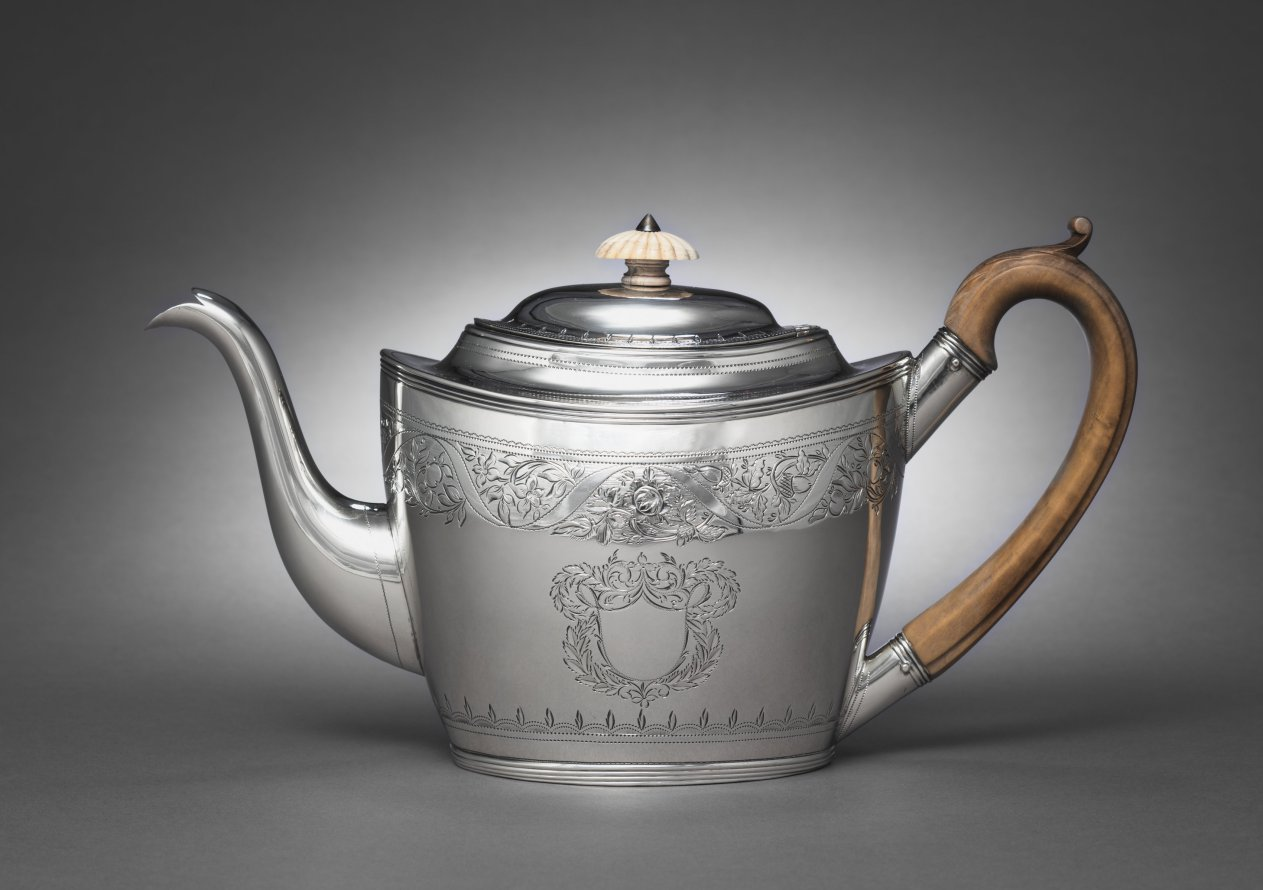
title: Tea Service (Teapot)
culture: London, England, 19th century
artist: Anne Bateman (British, 1748–1813)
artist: Peter Bateman (British, 1740–1825)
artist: William (I) Bateman (British, 1774–1850)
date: 1801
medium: silver, ivory, wood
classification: Silver